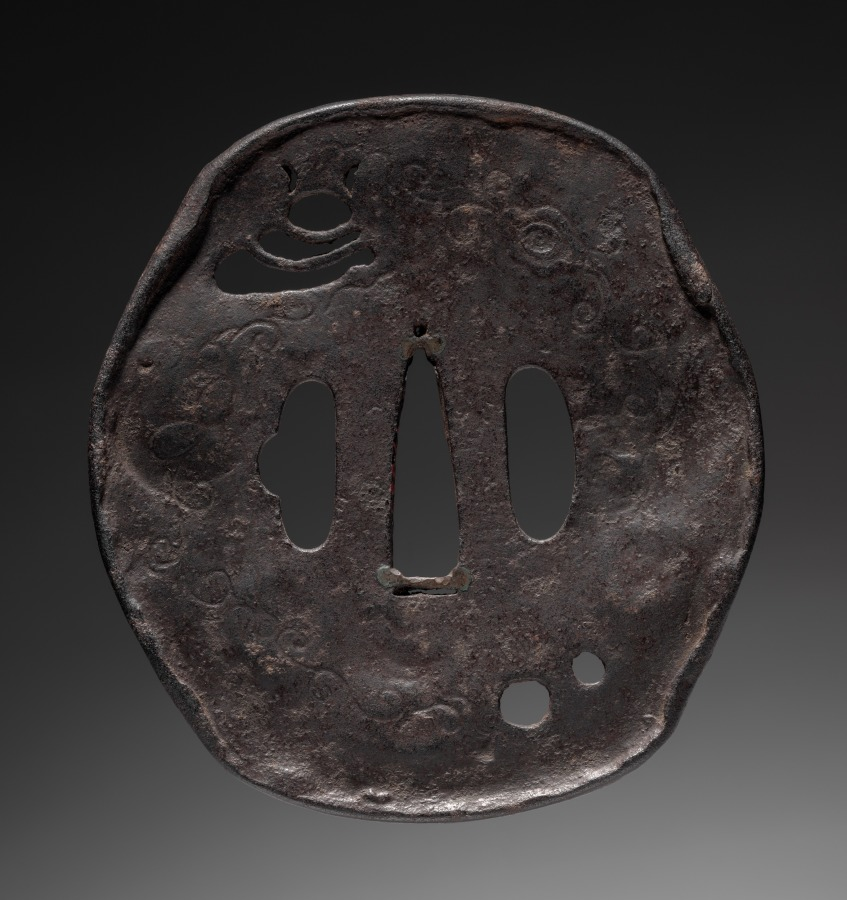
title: Sword Guard (Tsuba)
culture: Japan, possibly Edo period (1615-1868)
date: c. 1615–1868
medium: iron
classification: Arms and Armor